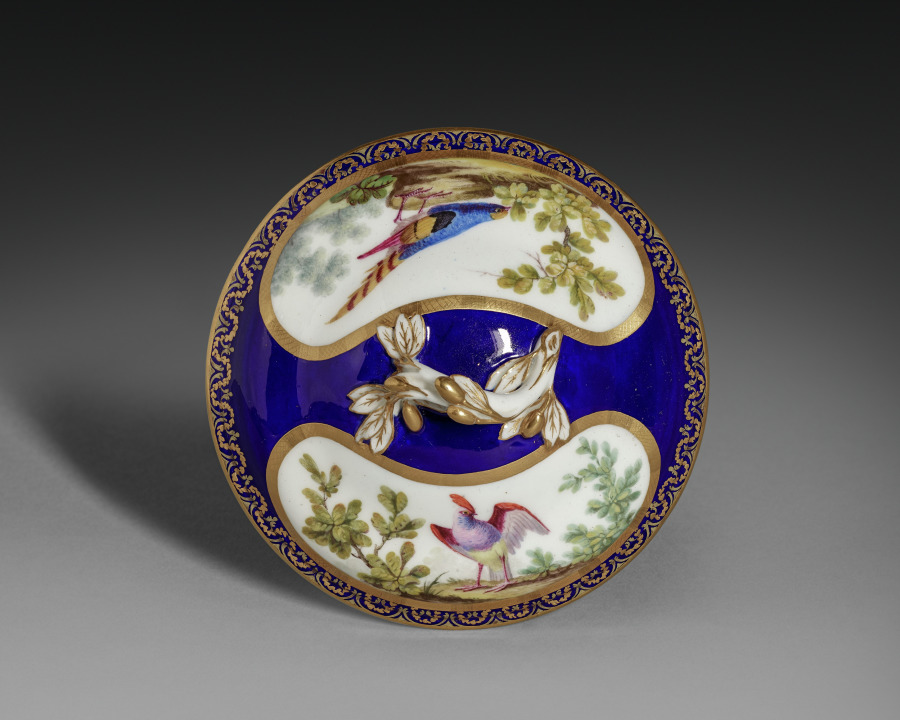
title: Cover for a Broth Bowl (Écuelle)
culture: France, Sèvres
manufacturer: Sèvres Porcelain Factory (French, est. 1756)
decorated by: François-Joseph Aloncle (French)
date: 1772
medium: soft-paste porcelain with enamel and gilt decoration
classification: Ceramic